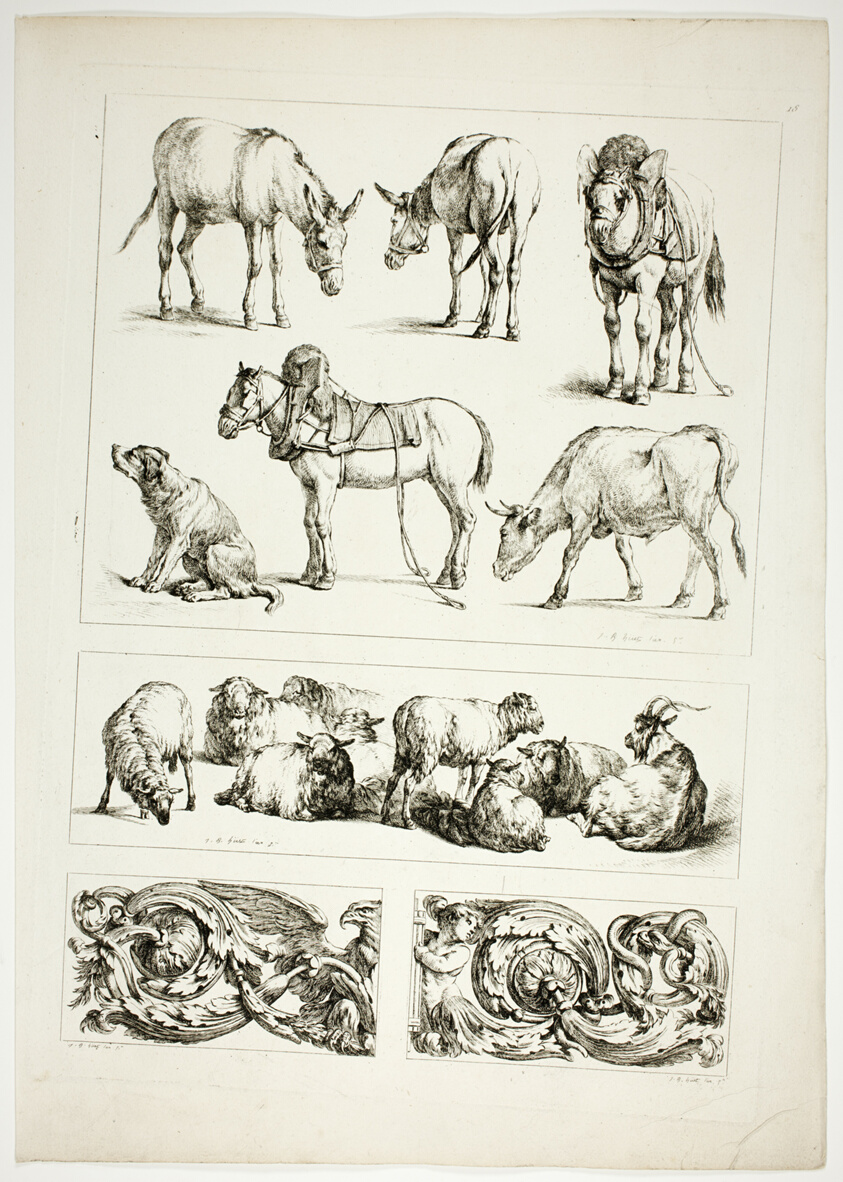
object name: Print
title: Plate fifteen of 38 from Oeuvres de J. B. Huet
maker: Jean Baptiste Huet (French, 1745-1811)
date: 1796–99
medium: Etching on paper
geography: France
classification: etching; print; prints and drawing